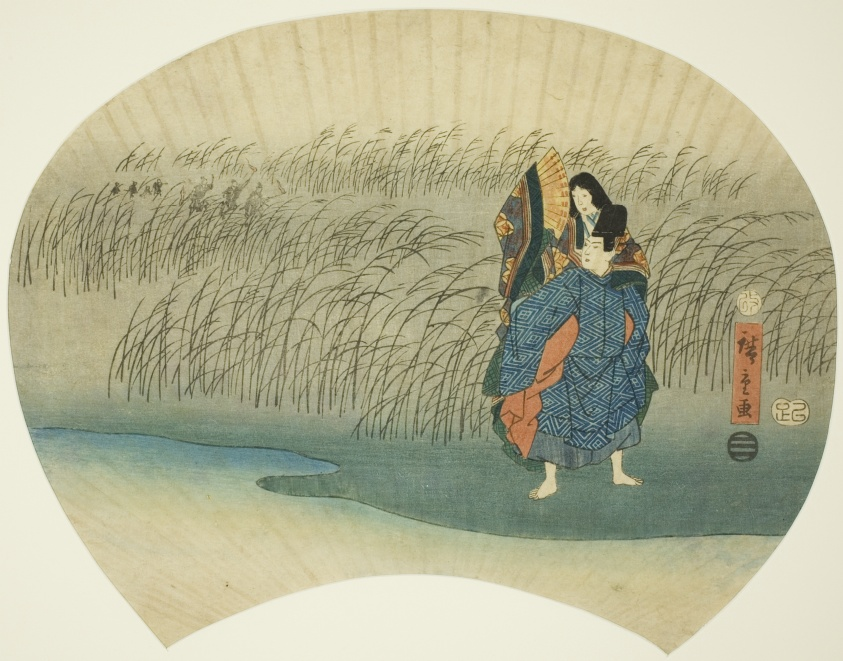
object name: Print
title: Couple eloping, from the Akutagawa episode in the Tales of Ise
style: Japanese (culture or style)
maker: Utagawa Hiroshige 歌川 広重; Japanese, 1797-1858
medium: Color woodblock print; uchiwa-e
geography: Japan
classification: woodblock print; print; asian art